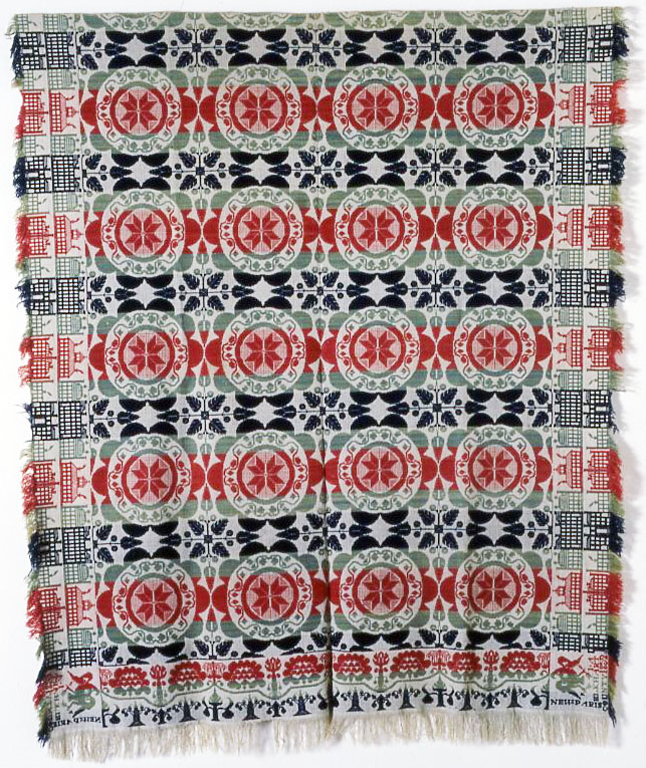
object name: Textile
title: Coverlet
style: 19th century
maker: Samuel Snider (American, born 1820); United States, Indiana, Elkhart County, New Paris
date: 1852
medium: Wool and cotton, plain weave with supplementary patterning wefts; main warp and extended supplementary weft cut fringe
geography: Indiana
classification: weaving - coverlet; coverlet; textile; weaving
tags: medallions, arrows, eagles, houses, flowers, trees, fruit, foliage, buildings, geometric motif, snowflake, star, circles, coverlet